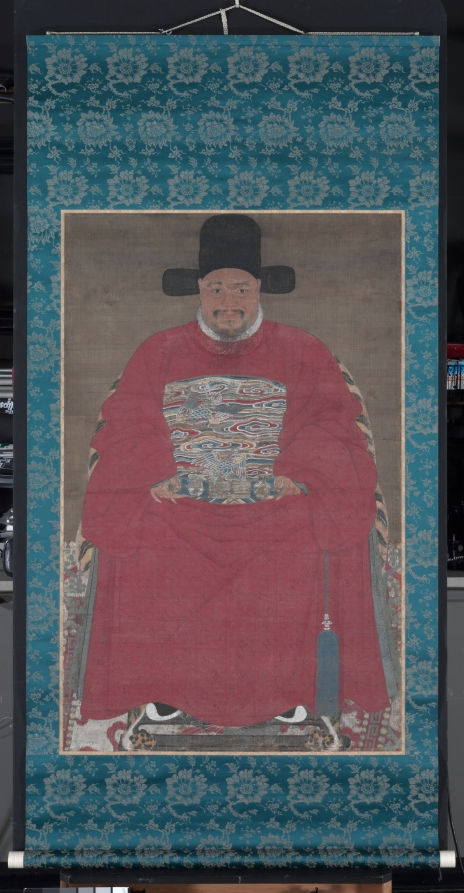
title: Portrait of an Official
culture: China, Ming dynasty (1368-1644) - Qing dynasty (1644-1911)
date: 1600s–1700s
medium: hanging scroll; ink and color on silk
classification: Painting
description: This official's portrait was done in the portrait painting style of the Ming dynasty.